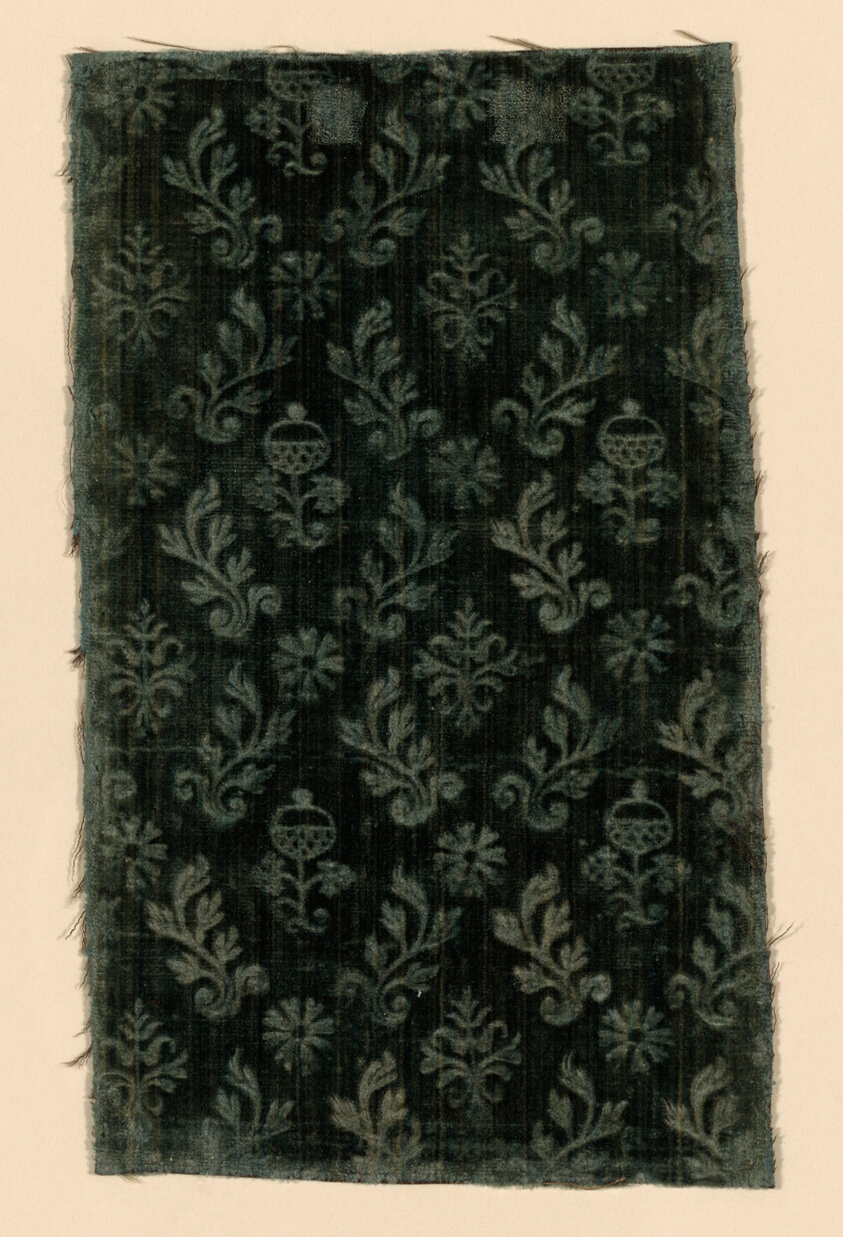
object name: Textile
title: Fragment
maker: Italy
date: 17th century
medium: Silk, cut, stamped velvet against twill weave foundation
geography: Italy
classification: textile; weaving - velvet; weaving